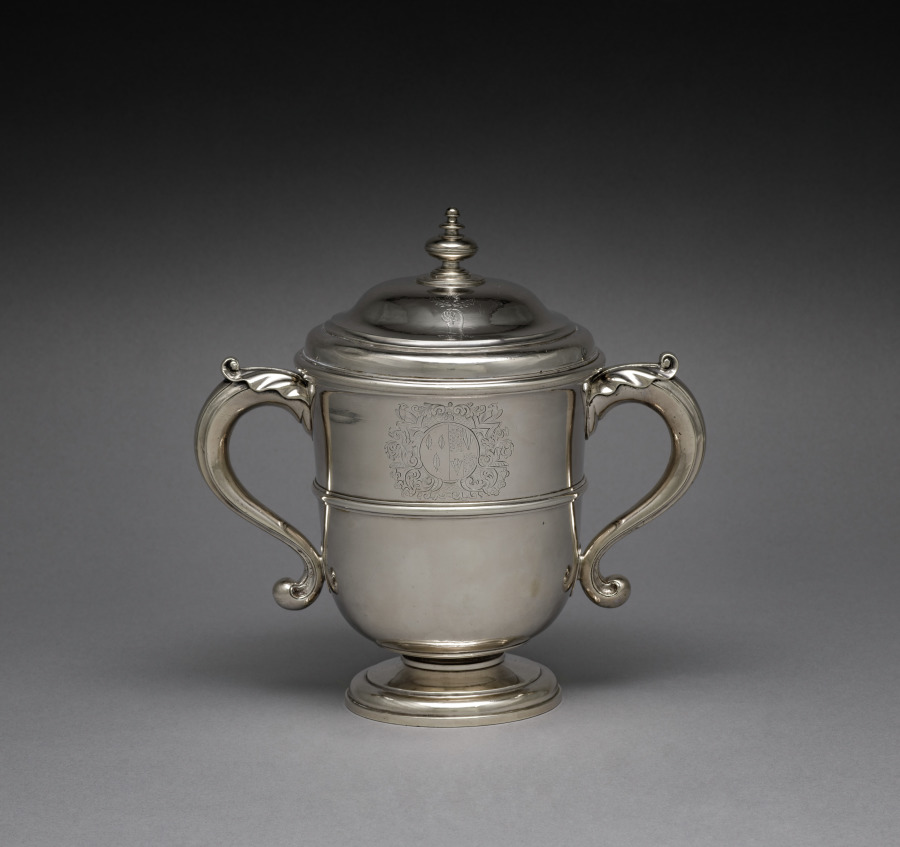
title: Two-Handled Cup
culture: England, London, 18th century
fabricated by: Anthony Nelme (British)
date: 1712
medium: silver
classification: Silver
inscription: engraved: coat of arms of Irvine of Bonshaw imaling O'Bryen.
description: Nelme was one of the most famous and successful native English silversmiths of a time when Huguenots (French Protestants) dominated the creation of richly decorated pieces for the most fashionable market.